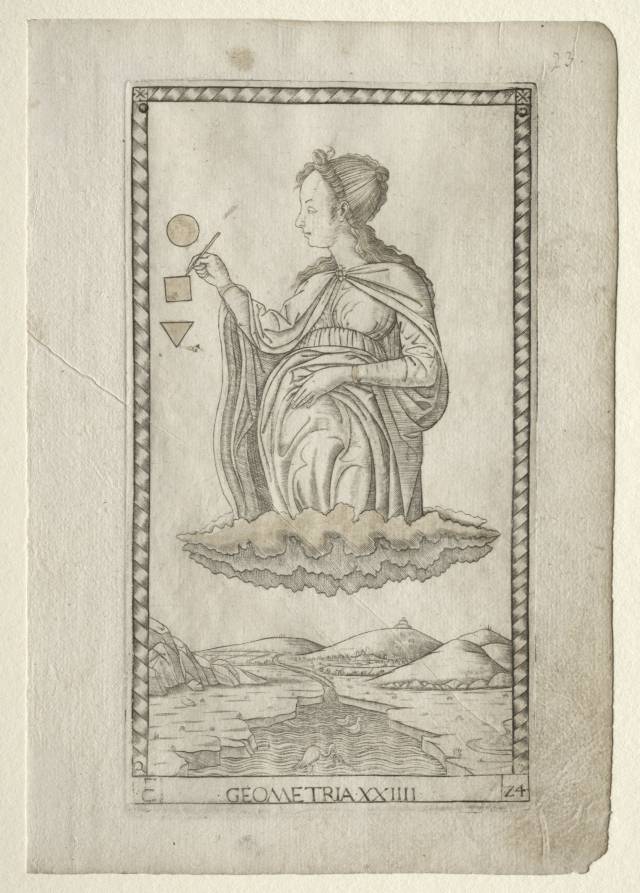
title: Geometry (from the Tarocchi, series C: Liberal Arts, #24)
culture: Italy, Ferrara, 15th century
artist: Master of the E-Series Tarocchi (Italian, active 1460s)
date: before 1467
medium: engraving, hand-colored with gold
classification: Print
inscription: Lettered below the image of Geometria (Geometry): ·C·/ ·GEOMETRIA·XXIIII· /·24·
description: This engraving is part of the group “C” named Liberal Arts. Conceptually, the liberal arts descended from classical antiquity, and were divided into the Trivium (Grammar, Rhetoric, and Dialectic or Logic) and the Quadrivium (Music, Geometry, Arithmetic, and Astronomy). In the Tarocchi set the total number was risen to ten, with the addition of the three disciplines (Poetry, Philosophy, and Theology). The liberal arts denoted knowledge or skills considered necessary to participate in a free society. By the late Middle Ages, they began to be represented in the visual arts as womanlike allegories. Here, Geometria (Geometry) is personified as a half-length pregnant female figure in profile, hovering in clouds above an imaginary landscape. She draws a square, triangle, and circle in the sky with her right hand. The identifying letter at the lower left corner of the print was originally an “E,” which was corrected by the engraver to a “C.”